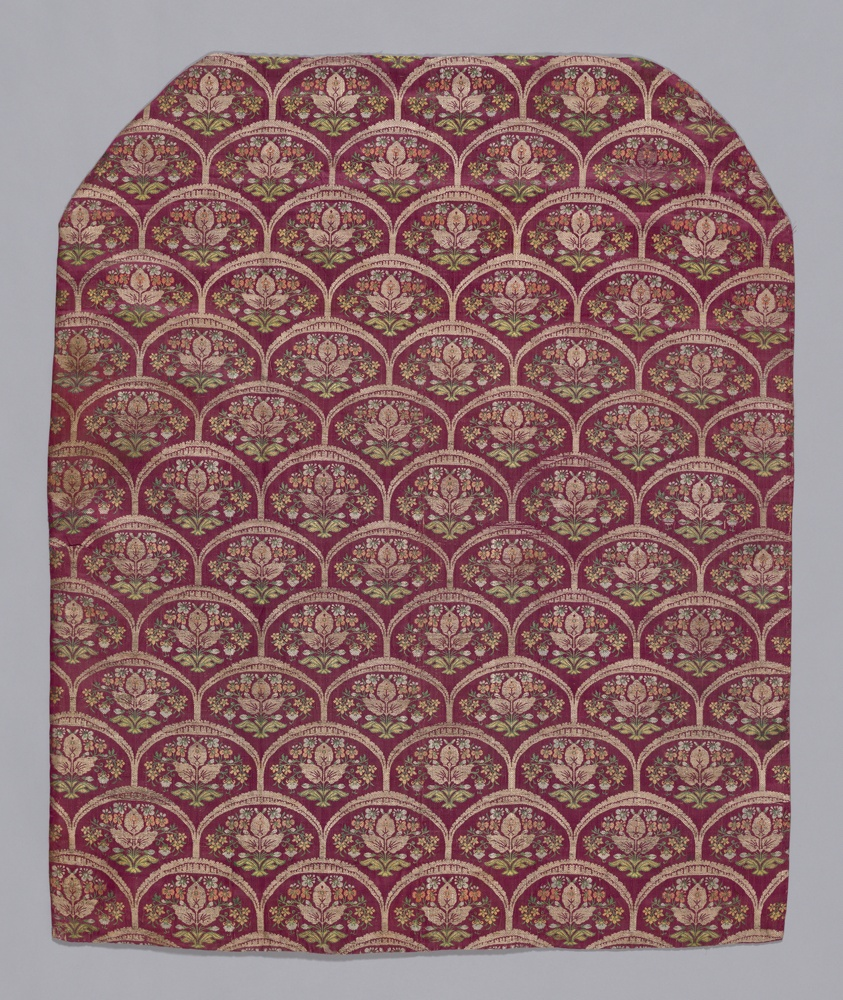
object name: Textile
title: Panel (Dress Fabric)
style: yazd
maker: Iran (Persia, Yazd)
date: 18th century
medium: Silk, satin weave; brocaded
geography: Iran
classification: textile; weaving